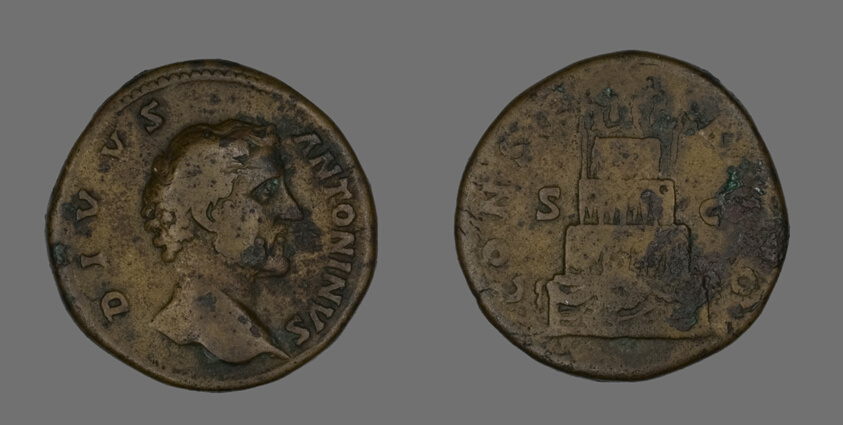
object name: Coin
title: Sestertius (Coin) Portraying Emperor Antoninus Pius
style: roman (ancient, style or period)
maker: Roman, minted in Rome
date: 161 or later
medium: Bronze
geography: Roman Empire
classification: coin; ancient art